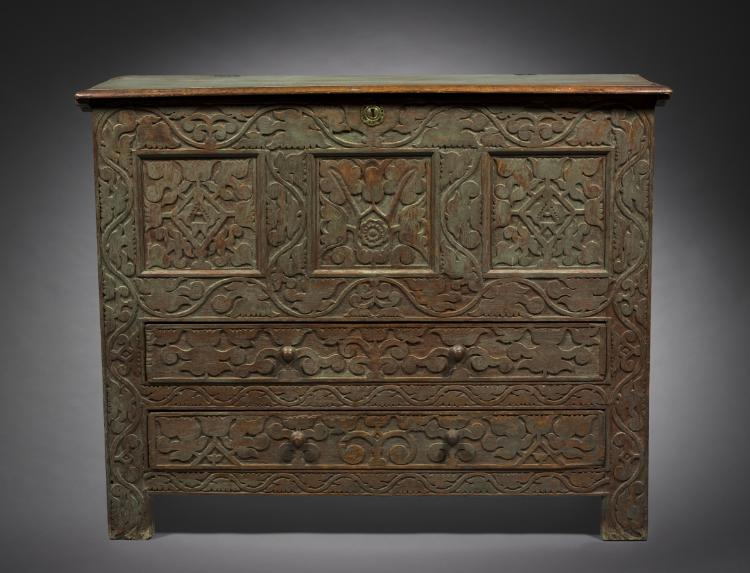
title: Chest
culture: America, Massachusetts, Connecticut River Valley (Hampshire county), late 17th - early 18th century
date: 1690–1720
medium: oak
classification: Furniture and woodwork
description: Lift-top storage chests with drawers are one of the most typical furniture forms of the 1700s. Although this chest was clearly made by someone far removed from more sophisticated English examples, its maker produced a distinctly energetic form. The carved decoration includes an intricate tulip-and-leaf pattern. The letters "AA" in the center of the blocks on either side of the central motif indicate the chest was probably made for a young woman with those initials.